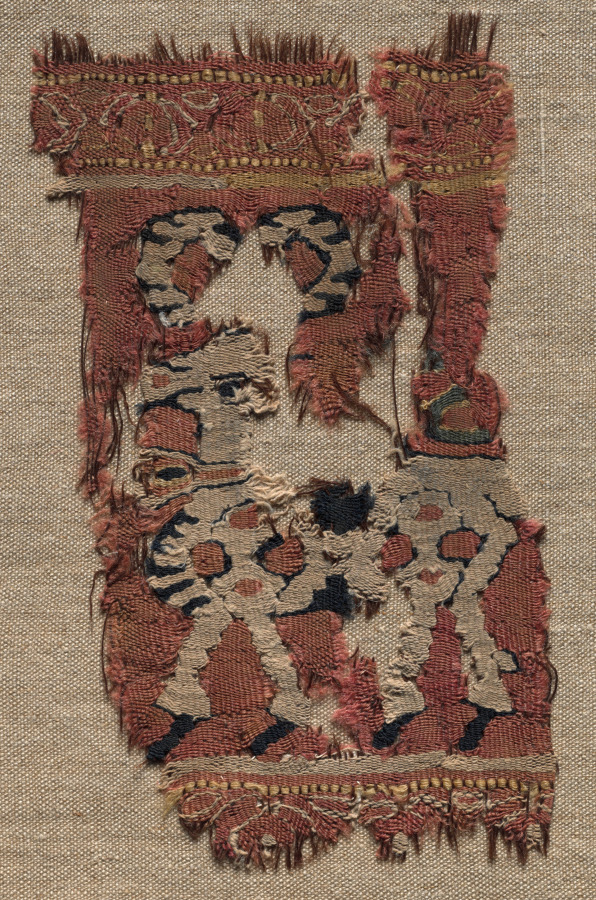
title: Fragment (from a Garment?)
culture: Iran or Iraq, Abbasid period (750–1258)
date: late 700s–early 800s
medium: tapestry (originally inwoven in tabby ground); goat hair, wool and cotton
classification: Textile